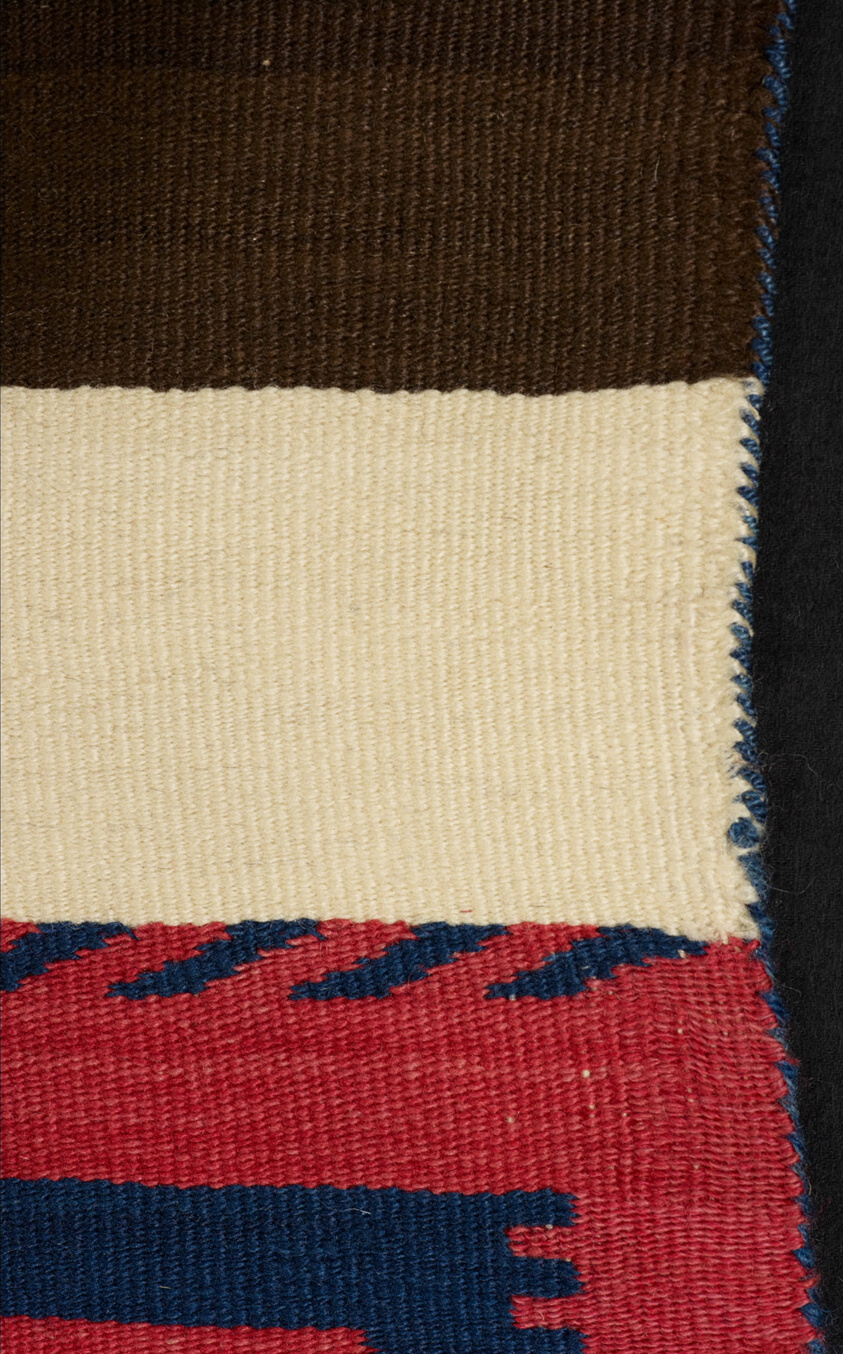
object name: Costume and Accessories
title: Wearing Blanket (Phase II)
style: navajo, americas, dine, 19th century, Arts of the Americas, indigenous, southwest, native american, north american, native north american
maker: Navajo (Diné) (Arizona, New Mexico, and Utah, United States)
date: 1850-65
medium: Wool; single interlocking tapestry weave; twined edges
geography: Navajo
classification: textile; blanket (covering); costume; garment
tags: geometric, arrow, squares, stripes